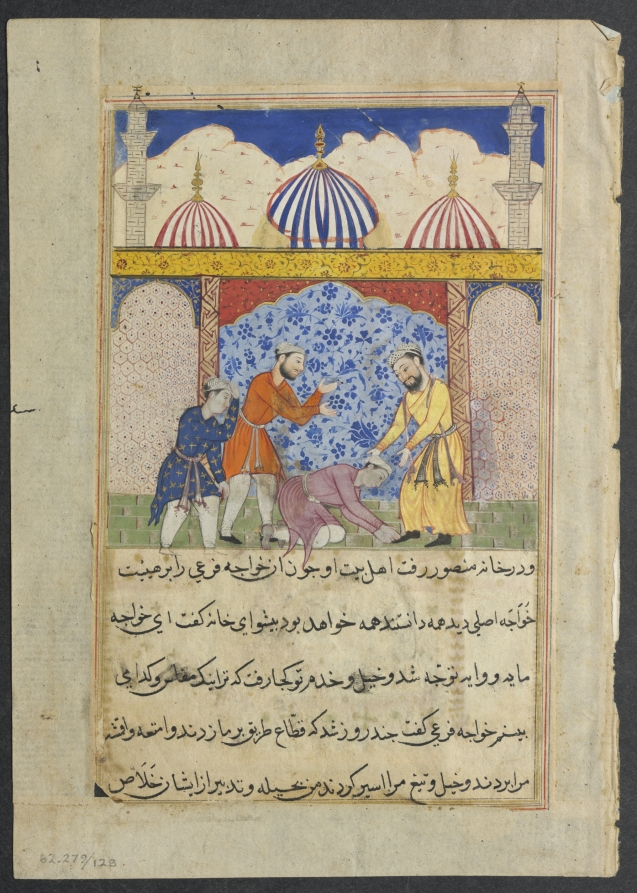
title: The young man, who has magically taken on the appearance of Mansur the merchant, arrives at his home, from a Tuti-nama (Tales of a Parrot): Seventeenth Night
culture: Mughal India, court of Akbar (reigned 1556–1605)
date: c. 1560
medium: gum tempera, ink, and gold on paper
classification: Painting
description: After receiving a magical epithet from a monk, the lascivious young man transformed his appearance into that of Mansur, the merchant, in order to go to bed with Manur’s wife. The imposter, dressed in yellow at the right, is welcomed home by members of Mansur’s household. They are distressed that he has returned unexpectedly without his horse, assistants, or belongings.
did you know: The magical, wish-fulfilling epithet derives from the names of God.